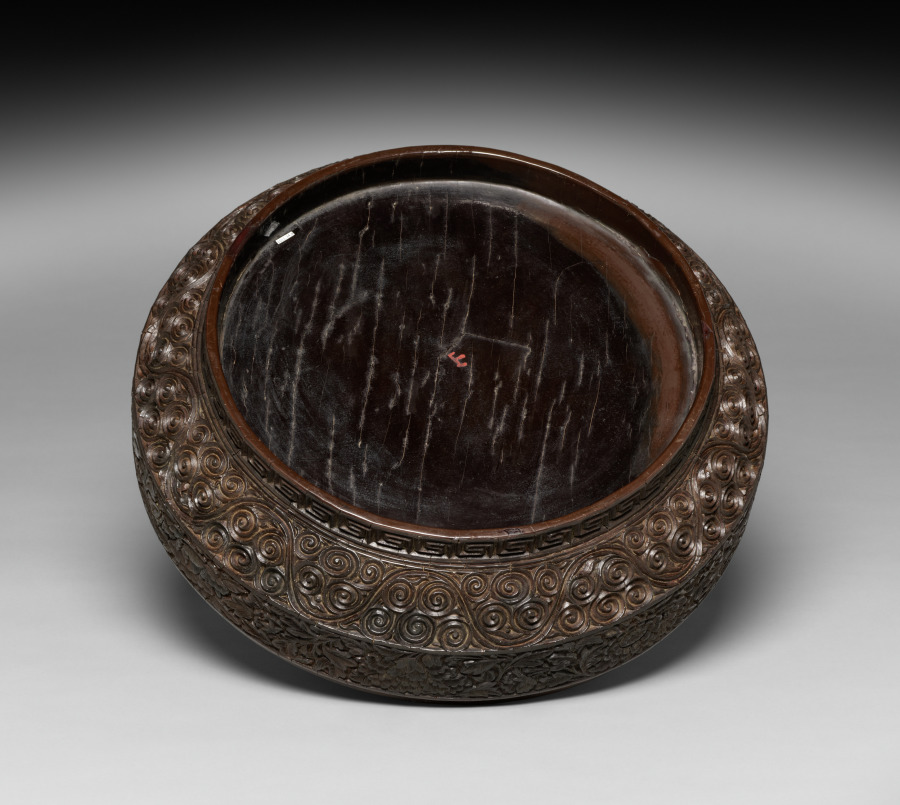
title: Round Box with Bird and Peonies Design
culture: China, late Southern Song (1127–1279) to early Yuan dynasty (1271–1368)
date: c. 1300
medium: carved lacquer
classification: Lacquer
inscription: 山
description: The carved lacquer box and lobed silver container nearby both feature pairs of birds and flowers on their covers. There is a striking similarity in decoration, shape, and aesthetic appeal. Both boxes suggest that successful designs and shapes circulated among craftsmen, workshops, and beyond regional borders.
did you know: To allow for the depth of carving, numerous layers of different colored lacquer were applied to a core of wood strengthened by a fabric covering impregnated with lacquer.